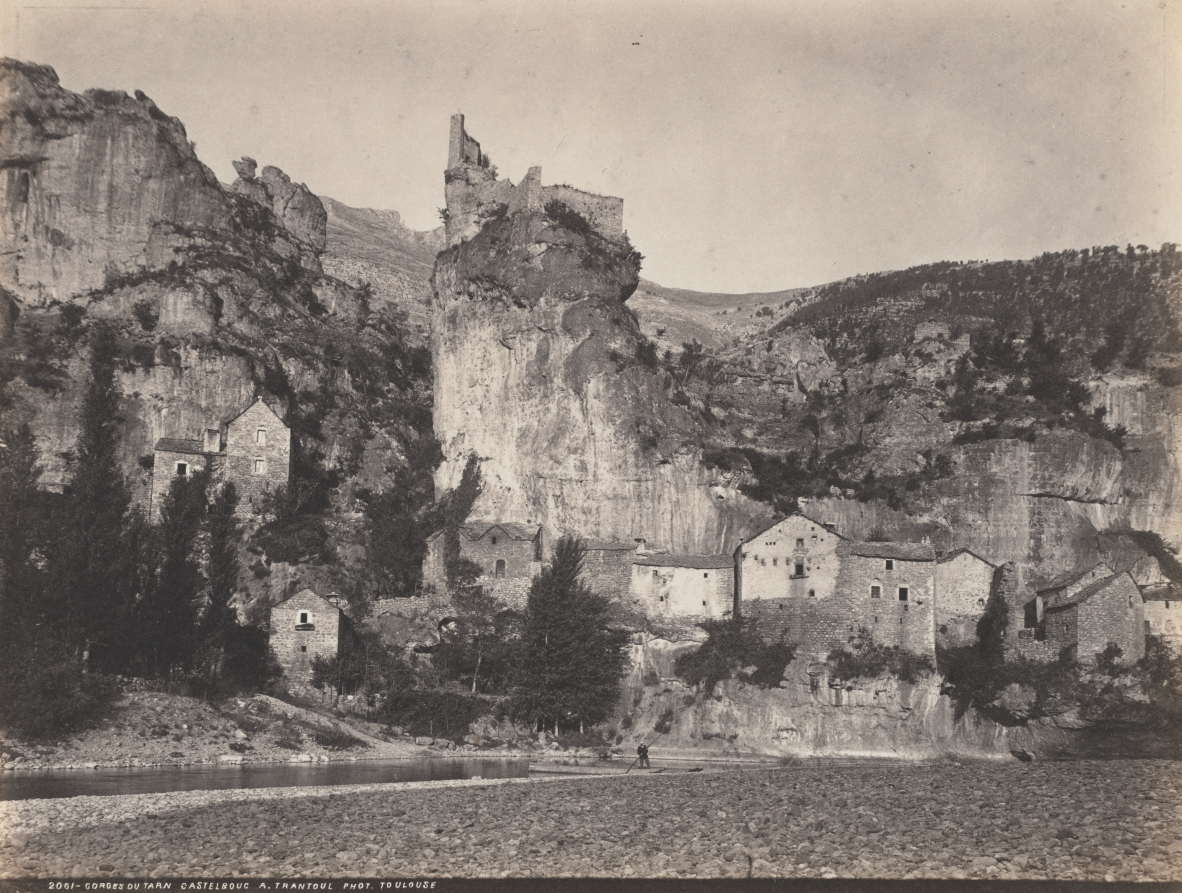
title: Gorges Du Tarn Castelbouc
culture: France, 19th century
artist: Amédée Trantoul (French, 1837–1910)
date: 1870s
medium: salted paper print from wet collodion negative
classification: Photograph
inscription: written in negative: "2061- GORGES DU TARN CASTELBOUC A.TRANTOUL PHOT. TOULOUSE"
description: The Gorges du Tarn is a canyon formed by the Tarn River in southern France. At the foot of some of its cliffs, below a ruined medieval castle, lies the ancient village of Castelbouc. It contains semitroglodyte dwellings, buildings that were built into the hillsides. Amédée Trantoul learned photography from his father, who had a studio in Toulouse which his son ran after his death.